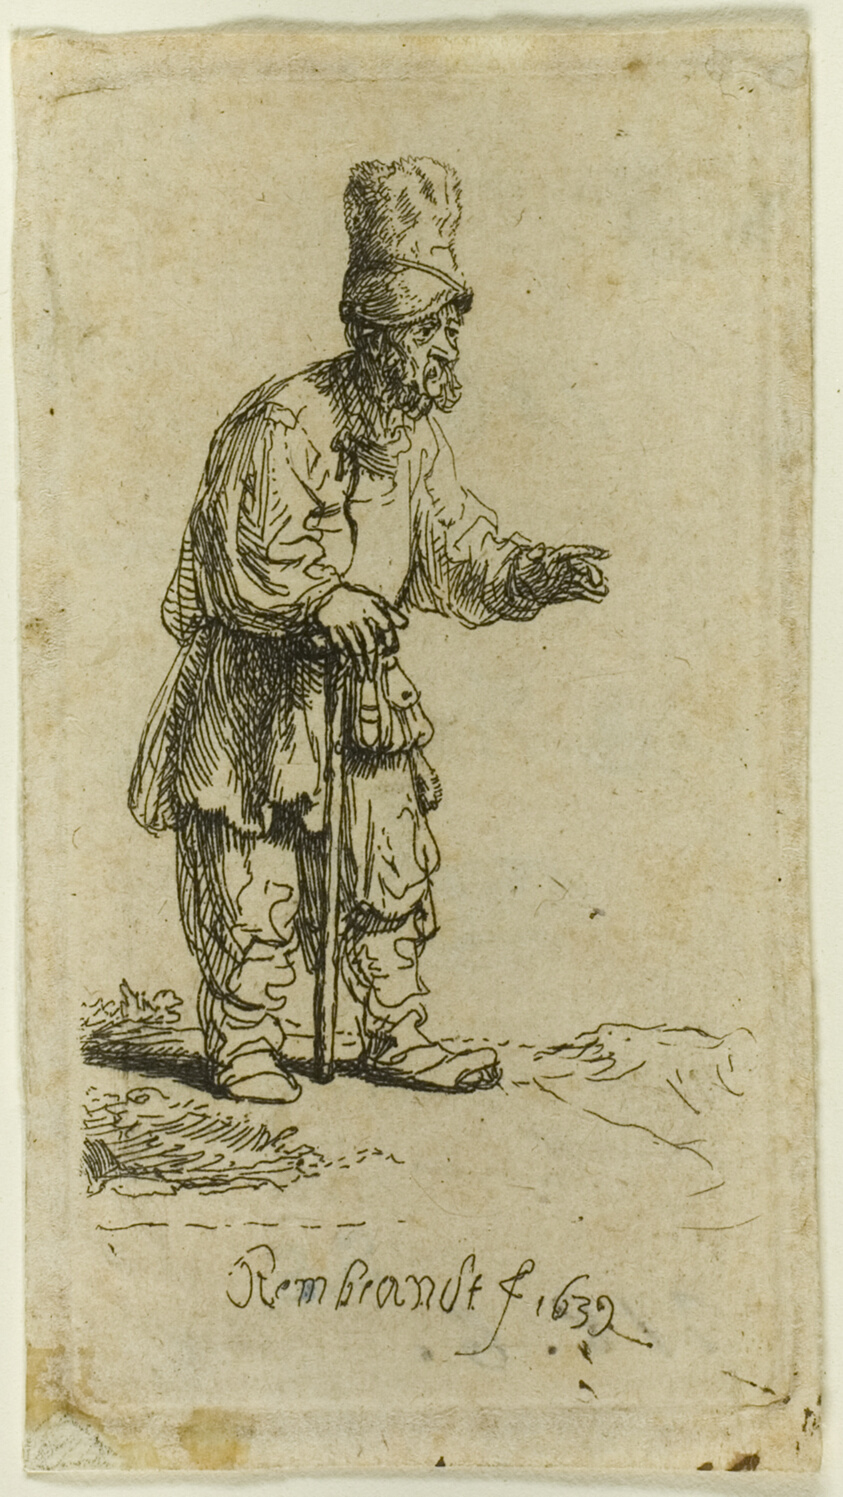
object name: Print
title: Peasant in a High Cap, Standing Leaning on a Stick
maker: Rembrandt van Rijn (Dutch, 1606-1669)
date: 1639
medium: Etching on paper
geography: Holland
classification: etching; print; prints and drawing; paper